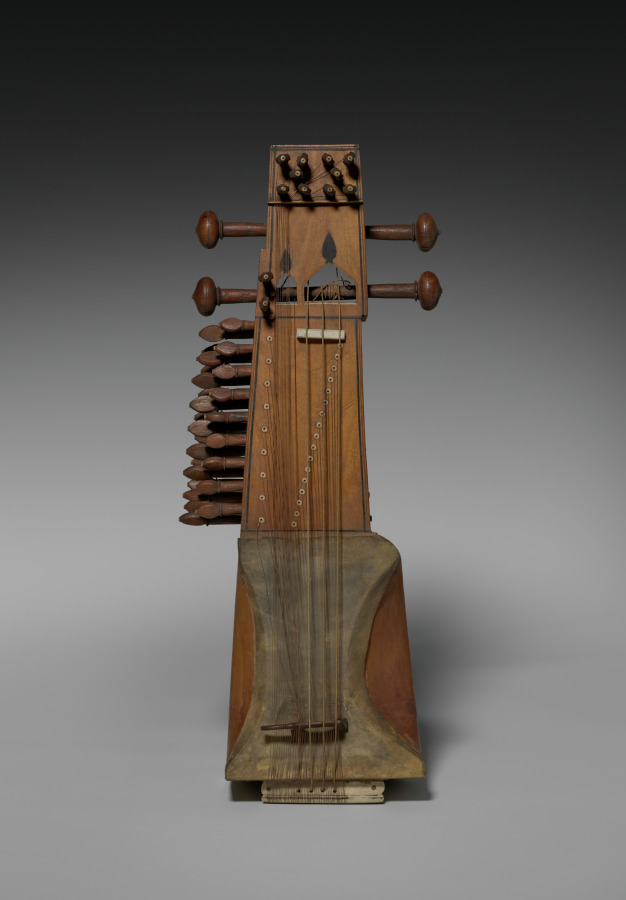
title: Sarangi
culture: India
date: 1800s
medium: Wood, parchment, bone or ivory, wood inlays, gut, and copper strings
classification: Musical Instrument